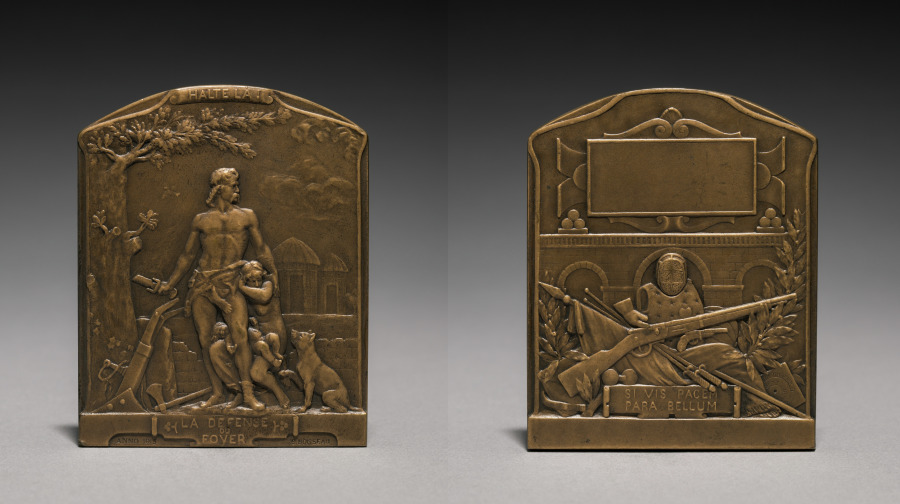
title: Medal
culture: France, 20th century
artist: Emile André Boisseau (French, 1842–1923)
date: 1914–1918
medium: bronze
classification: Metalwork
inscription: above: "Halte là"; below: "La defense du foyer."